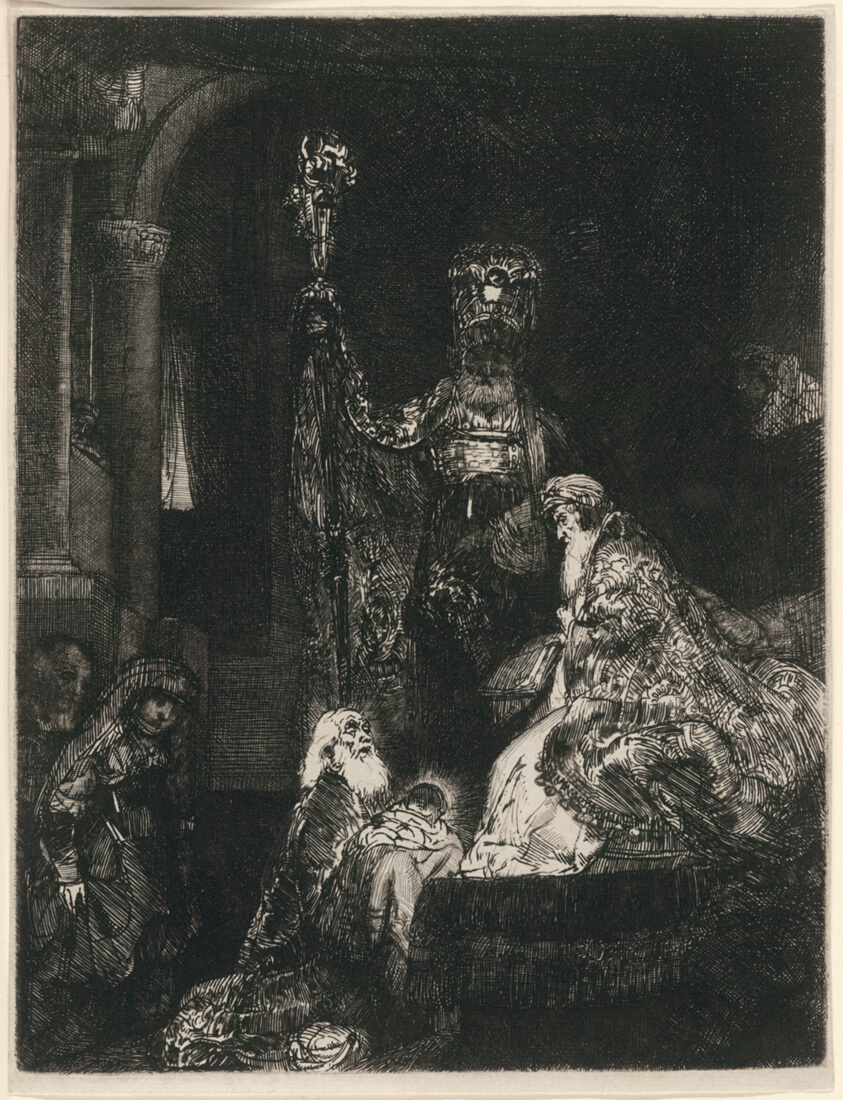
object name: Print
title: The Presentation in the Temple in the Dark Manner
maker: Rembrandt van Rijn (Dutch, 1606-1669)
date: c. 1654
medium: Etching and drypoint with burin, on ivory laid paper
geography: Holland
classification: etching; print; prints and drawing; paper; drypoint